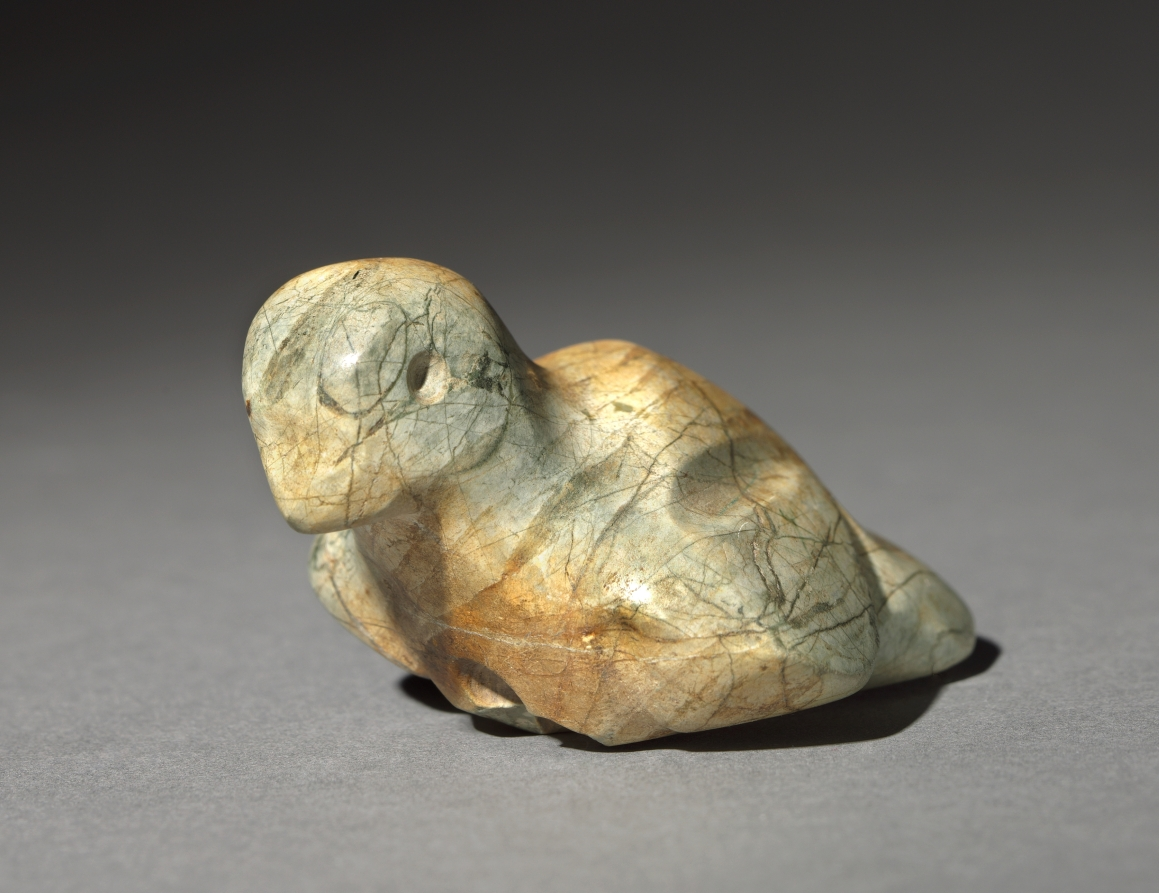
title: Bird Pendant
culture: Mesoamerica, Mexico, Guerrero, Mezcala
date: 100 BCE–300 CE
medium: polished gray-brown stone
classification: Sculpture